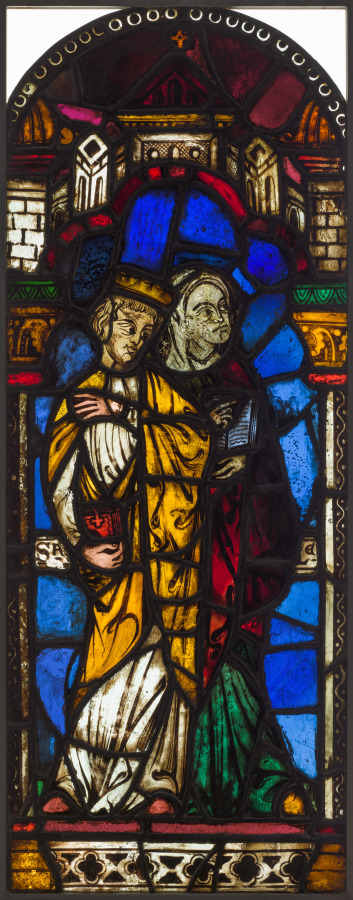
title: Panel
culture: France, early 13th century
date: c.1200–1225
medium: pot-metal and white glass, silver stain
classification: Glass